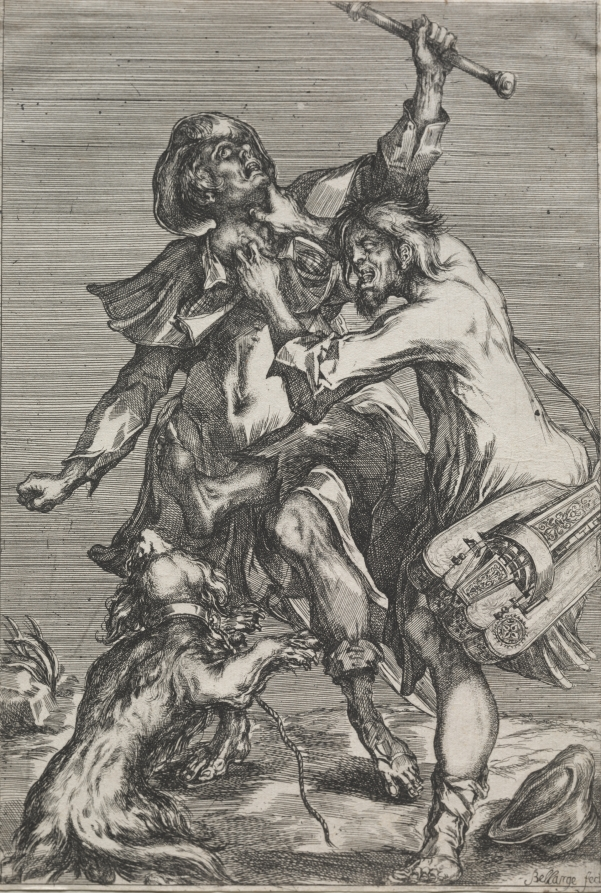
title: Two Beggars Fighting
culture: France, 17th century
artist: Jacques Bellange (French, c. 1575–1616)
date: 1610–20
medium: etching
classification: Print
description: Since antiquity, music was considered to inspire two different effects: it could elevate the soul to spiritual thoughts, or arouse passions both violent and sensual. In this genre scene, two transients engage in an epic struggle. The hurdy-gurdy, slung across the body of one of the vagabonds, was considered a "base" instrument whose melodies heated the senses without uplifiting the spirit. In his Syntagma Musicum of 1618, the musical theorist Michael Praetorius dubbed the hurdy-gurdy a "fiddle for peasants and loose women."